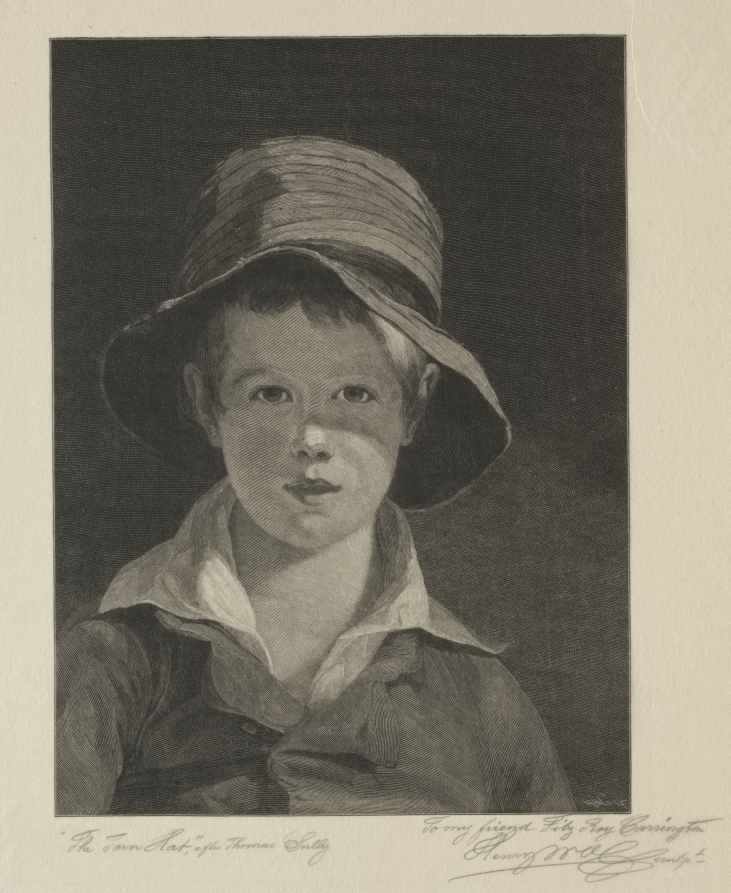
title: The Torn Hat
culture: America, late 19th-early 20th century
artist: Henry Wolf (American, 1852–1916)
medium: wood engraving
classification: Print